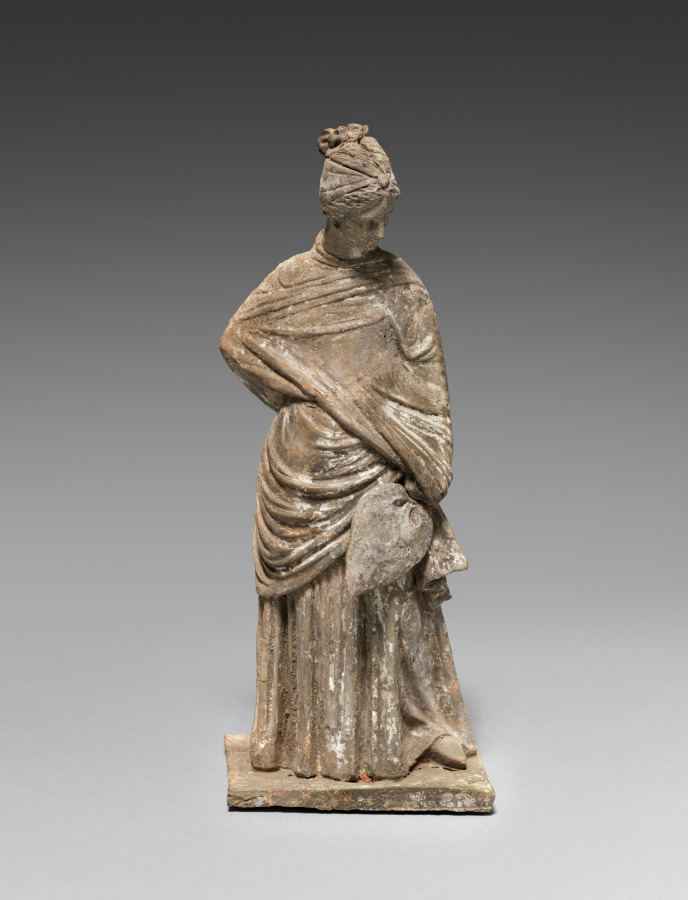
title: Figurine of a Lady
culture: Greece, Tanagra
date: 200s BCE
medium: terracotta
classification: Sculpture